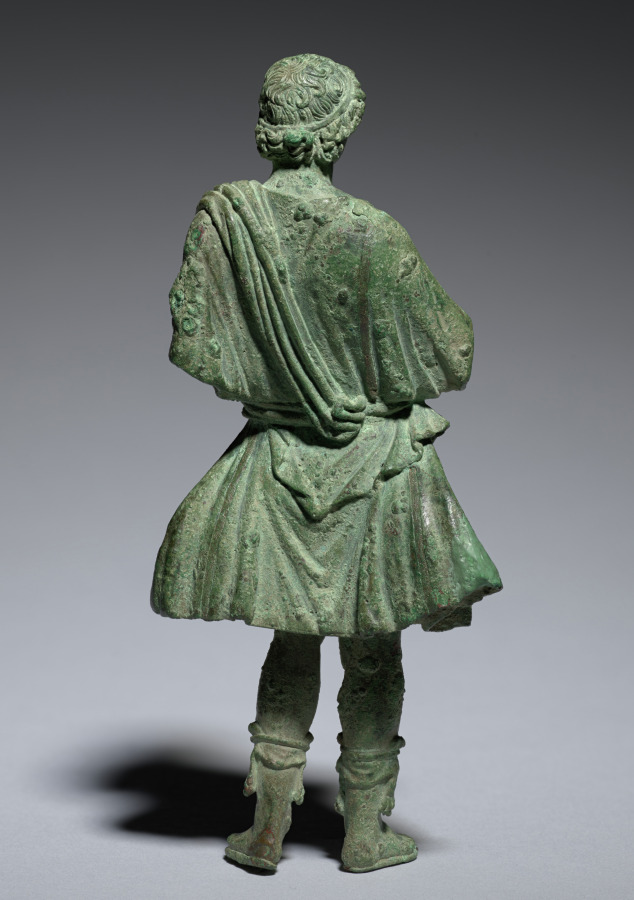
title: Lar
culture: Italy, Rome, Early Imperial period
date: 1–25 CE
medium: bronze with copper inlays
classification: Sculpture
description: This youthful bronze figure wears a short tunic with copper inlaid stripes and open-toed boots with animal-skin liners. The figure’s arms are missing, but based on other surviving examples, they likely held a libation dish and cornucopia. Even without these attributes, the figure can be identified through dress and stance as a type of Lar, or domestic deity, known as the Lar Familiaris (Household Lar), standing in a characteristic "quiet pose." Other types of Lares include the Lares Compitales and Lares Augusti (Lares of crossroads and of Augustus, respectively).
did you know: This statuette likely stood with other small bronzes in a household shrine called a lararium.